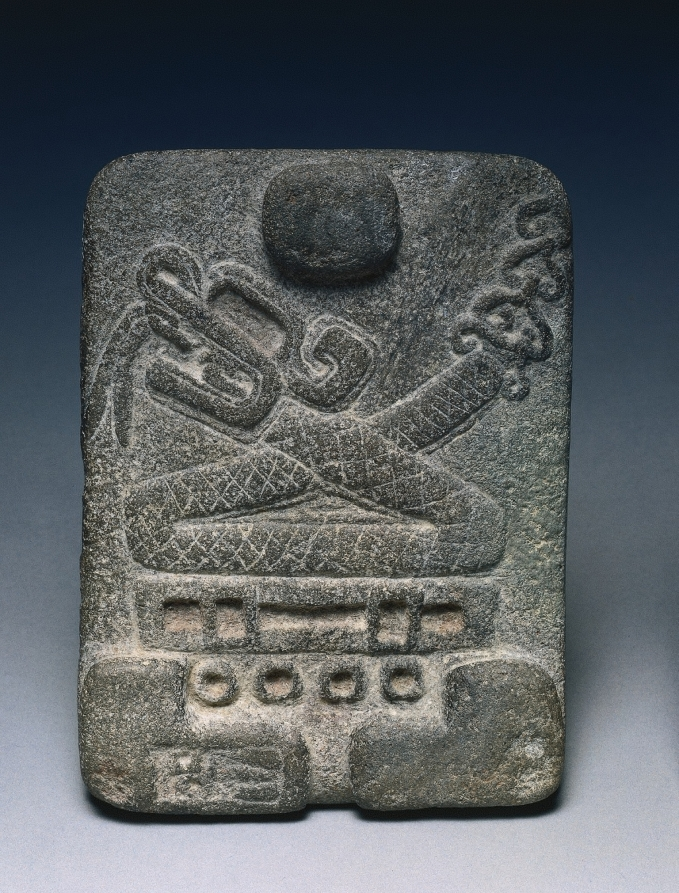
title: Miniature Metate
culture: Central Mexico, Xochicalco?, Classic Period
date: 700–1000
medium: stone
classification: Stone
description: This miniature grinding stone, decorated on the underside, was made during an era of extensive interregional contacts and artistic influences. The bar and four dots below the serpent represent the number nine, executed in the style of Xochicalco, in Morelos. The rattlesnake above resembles contemporary carvings from Veracruz, to the east. Possibly "9 Rattlesnake" was the name of an individual, or a date in the poorly understood Xochicalco calendar.